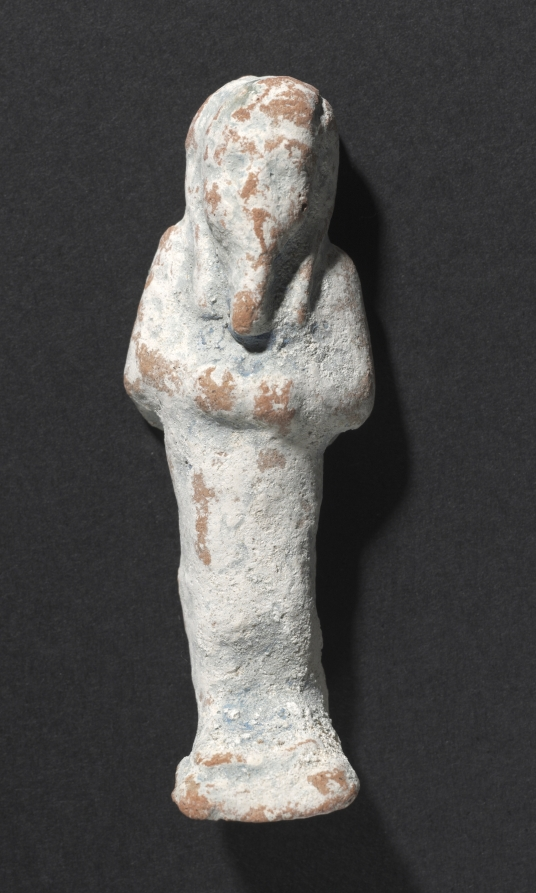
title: Shawabty of Ditamenpaankh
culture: Egypt, Late period (715–332 BCE), Dynasty 25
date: 715–656 BCE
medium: terracotta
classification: Funerary Equipment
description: High demand for shawabtys in the Late Period, a time when as many as 400 or more shawabtys were placed in the tomb with the deceased, gave rise to a specialized container for storing them: the shawabty box. This example is inscribed for the lady of the house, Ditamenpaankh, and was probably one of a pair originally made for her. The single-masted boat on the box's lid is perhaps an allusion to the pilgrimage of the deceased to the holy city of Abydos, the cult city of Osiris, king of the dead. The shawabtys inside are crude, mass-produced examples cast in an open mold. Made of terracotta, their blue paint imitates more costly shawabtys made of faience. As for the shawabty spell, it has been removed from its traditional location on the shawabty's front and relocated onto the sides of box, where it needed only to be written once, thus expediting production.